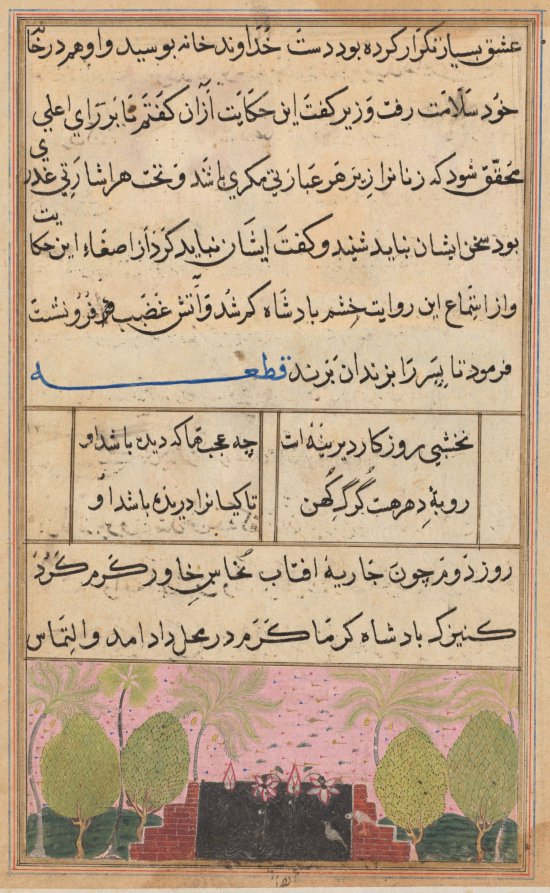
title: Landscape with a lotus pool, from a Tuti-nama (Tales of a Parrot), Eighth Night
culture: Mughal India, court of Akbar (reigned 1556–1605)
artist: Gujarati (Indian, active 1550s-1590s)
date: c. 1560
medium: gum tempera, ink, and gold on paper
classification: Painting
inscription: aiẓan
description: Two white birds wade at the edges of a dark colored lotus pool surrounded by lush green trees. Though the artist is from the western Indian state of Gujarat, many elements reveal a familiarity with Persian painting conventions, such as the arid pink ground with tufts of grass, the overlapping leaves of the trees, and the grassy sward. The water was once silver, which has now tarnished black, and white lines render swirling eddies.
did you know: The inscription on this page attributes it to the same artist as the previous painting (1962.279.58.a).